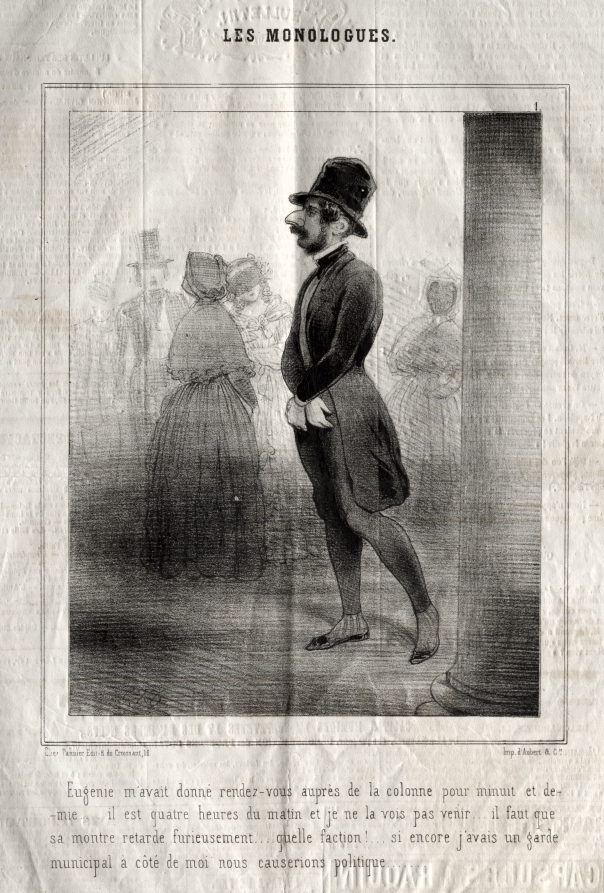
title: Les Monologues: Eugénie m'avait donné rendez-vous auprès de la colonne pour minuit et demie...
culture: France, 19th century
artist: Charles Joseph Traviès de Villers (French, 1804–1859)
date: c. 1830–45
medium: lithograph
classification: Print